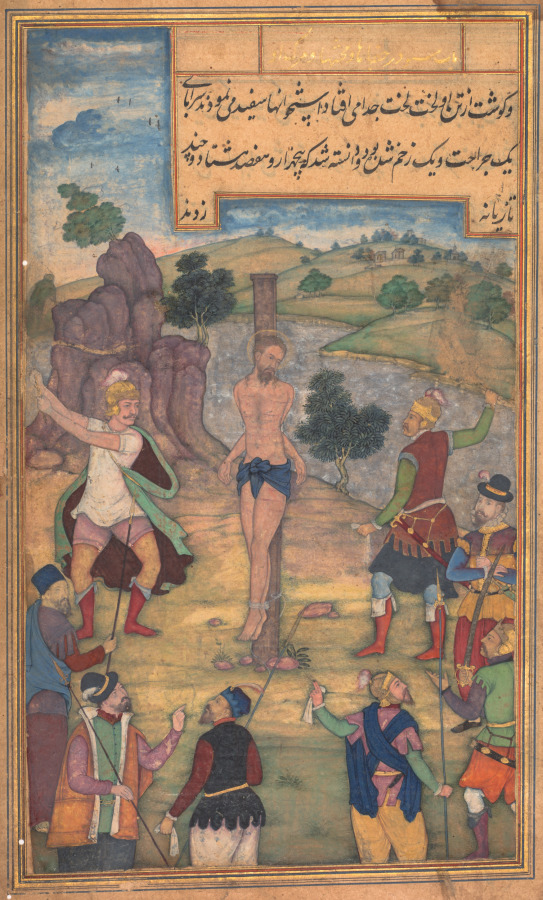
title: The Flagellation (folio 182 recto), from a Mirror of Holiness (Mir’at al-quds) of Father Jerome Xavier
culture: Mughal India, Allahabad, made for Prince Salim (1569–1627)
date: 1602–4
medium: Gum tempera, ink, color, and gold on paper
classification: Manuscript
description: Two Romans flog Jesus, who has been bound to a stake at the center of the circular composition made up of soldiers and the hilly horizon. His subtly articulated expression conveys both pain and compassion, as he endures cuts to his flesh and the bindings around his elbows that secure him so tightly to the post that his feet are elevated off the ground. This is the last illustration in the Cleveland manuscript of the Mirror of Holiness. The Crucifixion was never illustrated, possibly because the patron, Prince Salim, was Muslim. According to the Koran, Jesus did not die on the cross, but was absorbed into heaven by Allah.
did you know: A halo encircles Jesus’s head, and his hair and beard are highlighted with gold.